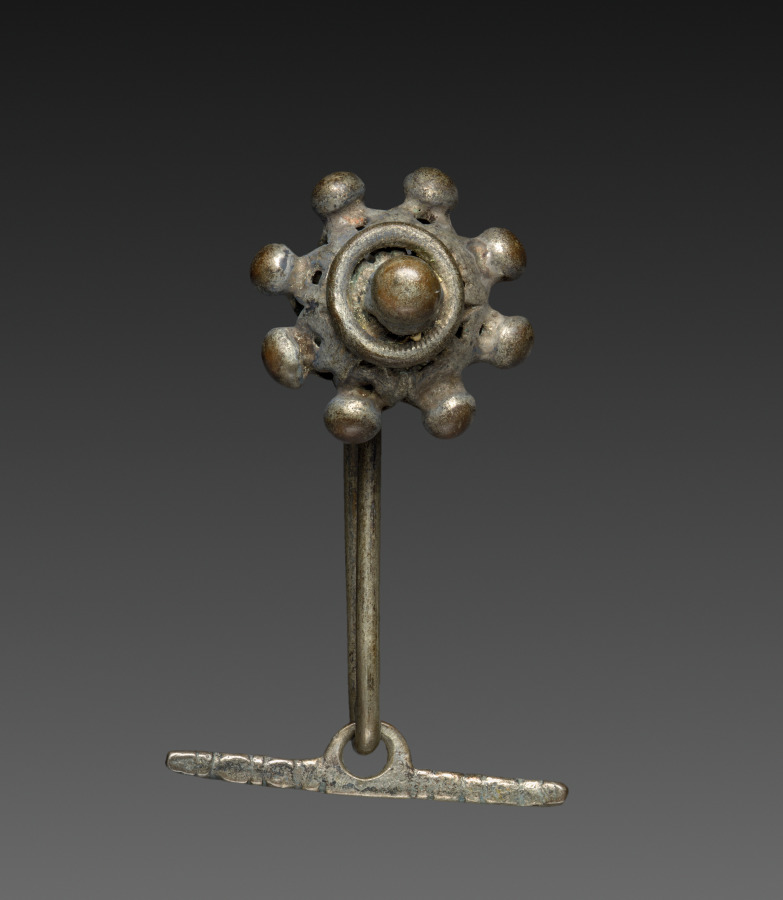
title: Button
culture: Italy, Sardinia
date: 1800s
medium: silver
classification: Jewelry